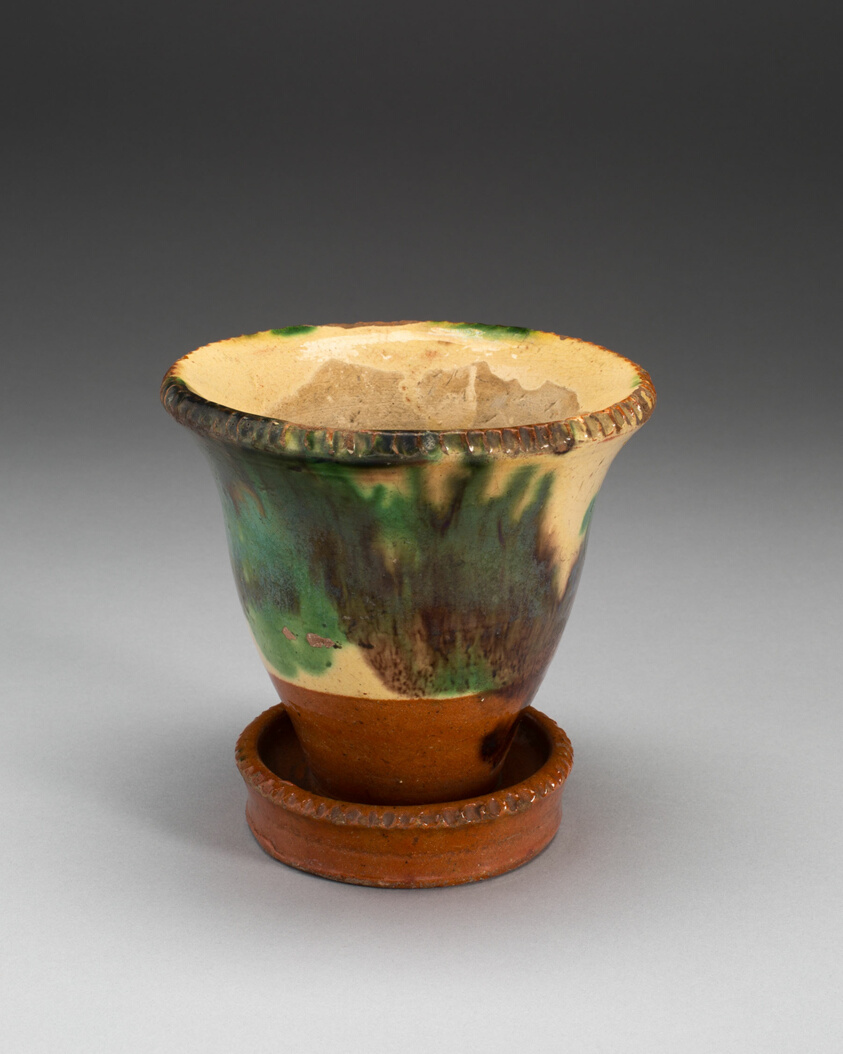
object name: Decorative Arts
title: Flower Pot with Stand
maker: Artist unknown (American, 19th–20th century); Possibly Strasburg, Virginia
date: 1890–1900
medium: Earthenware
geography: Strasburg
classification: cachepot; earthenware; flowerpot; ceramics; american decorative arts; american arts; decorative arts